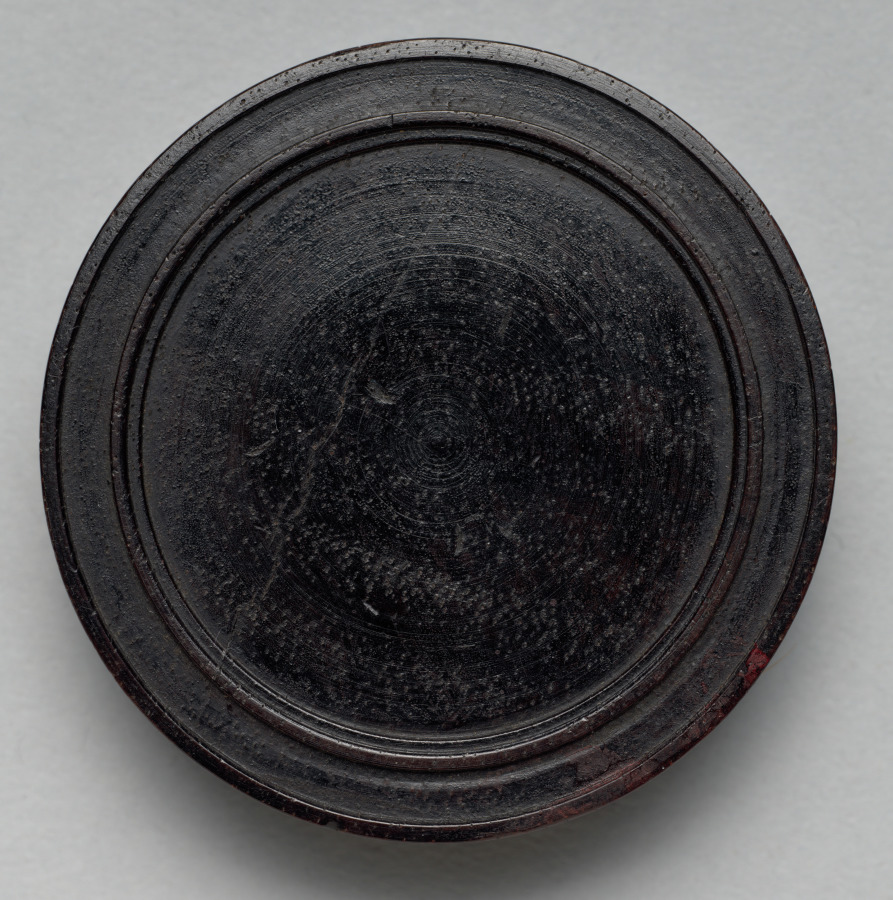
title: Gaming Piece (reverse)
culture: Germany, late 17th-early 18th Century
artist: Martin Brunner (German, 1659–1725)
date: c.1700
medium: wood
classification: Furniture and woodwork